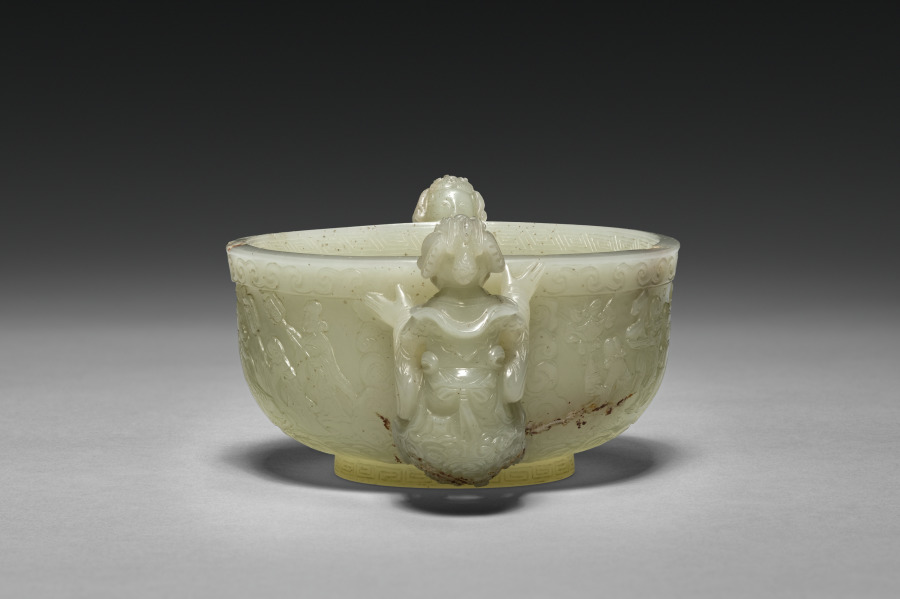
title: Cup with Daoist Figures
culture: China, Qing dynasty (1644–1911), Qianlong period (1736–95)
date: 1736–95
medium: Pale greenish-white jade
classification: Jade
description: During the Qing dynasty, Suzhou’s best products were sent north to the capital. Those that met imperial approval were sometimes graced with Qianlong’s mark, added by calligraphers and jade workers at court. The lack of a Qianlong mark on the Cleveland cup suggests that it might not have reached the court. Previously dated to the Yuan dynasty (1271–1368), new scholarship dates this cup to the Qing period.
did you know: Two female immortals serve as handles, while a Daoist procession with immortals, musicians, and attendants winds around the body of the cup.